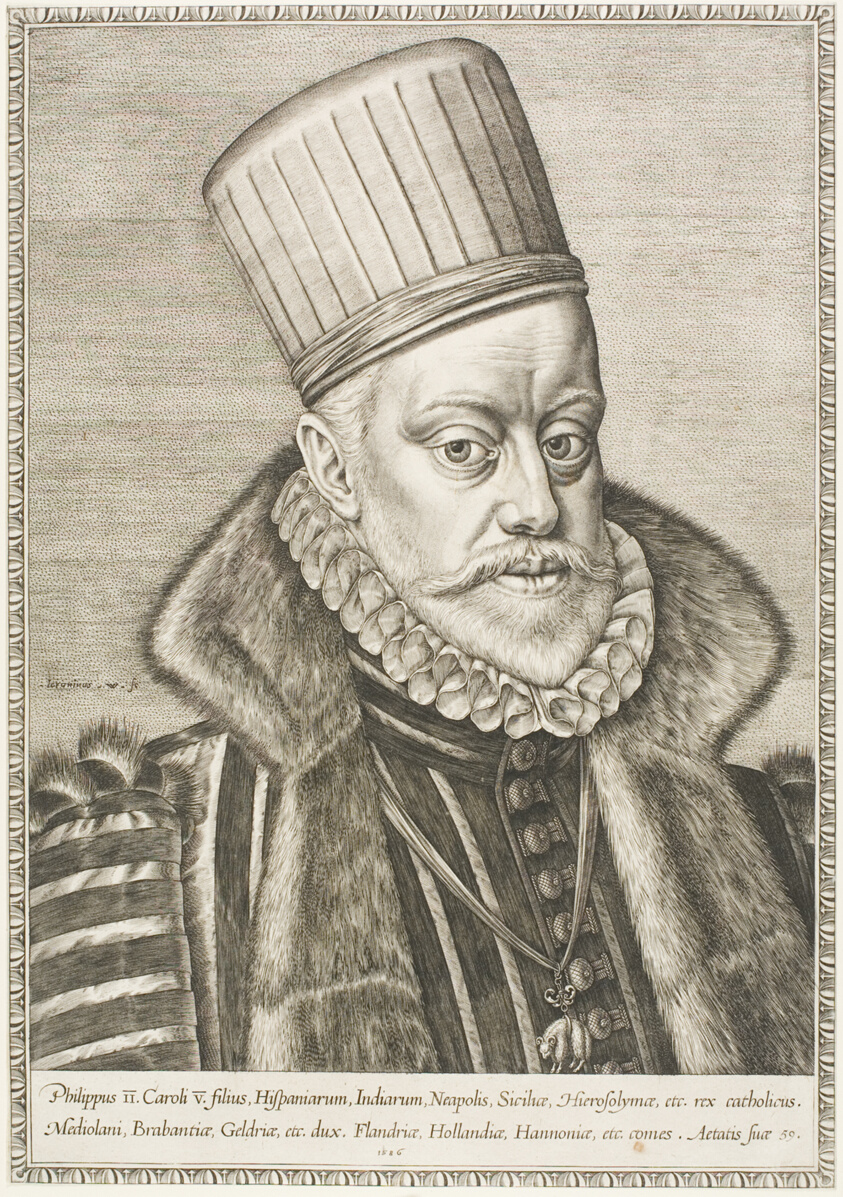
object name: Print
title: Phillip II, King of Spain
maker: Hieronymus Wierix; Flemish, 1553-1619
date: 1586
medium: Engraving in black on ivory laid paper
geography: Flanders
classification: engraving; print; prints and drawing